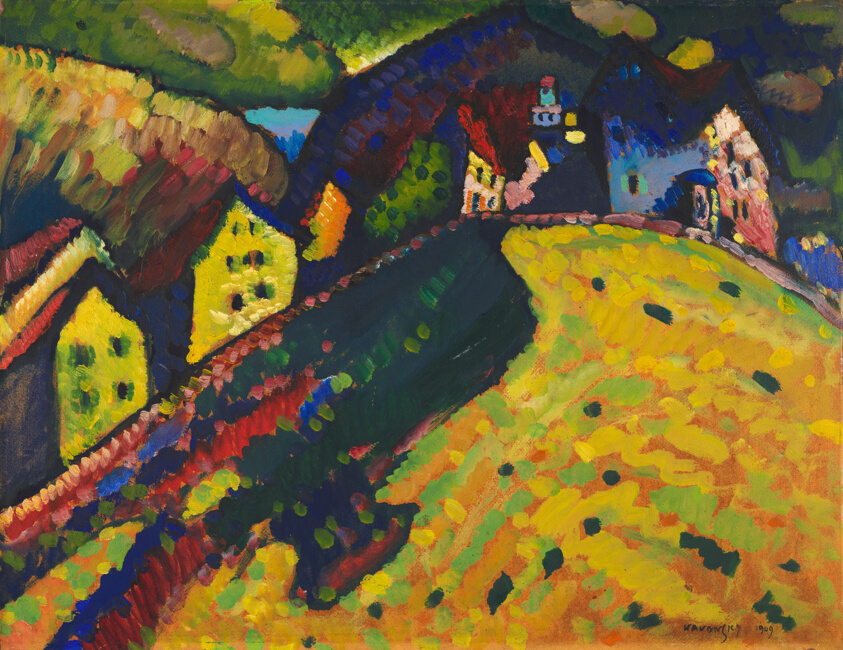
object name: Painting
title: Houses at Murnau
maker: Vasily Kandinsky (Born Moscow (formerly Russian Empire, now Russia), 1866; died Neuilly-sur-Seine, France, 1944)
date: 1909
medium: Oil on cardboard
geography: Germany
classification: painting; modern and contemporary art